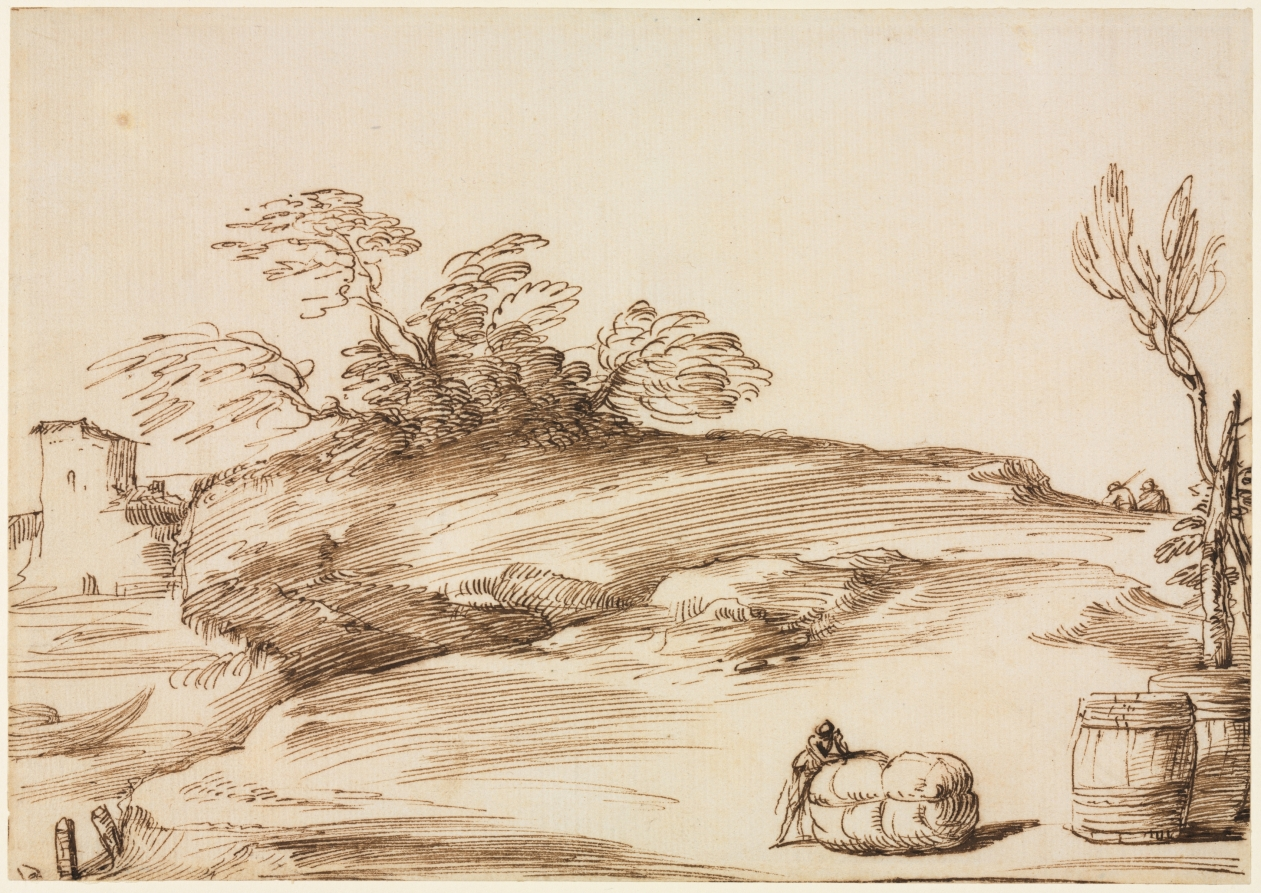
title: Landscape with a Man Leaning on a Bale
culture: Italy, 17th century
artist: Guercino (Italian, 1591–1666)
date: c. 1640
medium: pen and brown ink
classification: Drawing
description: The tradition of landscape as an independent subject in Italian art stretches back to the 1500s and was flourishing in the 1600s, when Guercino made this drawing. Guercino, however, rarely painted pure landscape, preferring to explore this genre in the more intimate medium of drawing. This sheet, with its fluid pen lines and unified composition enlivened by small figures, is a typical example of his ability to integrate picturesque motifs into an asymmetrical, balanced whole.